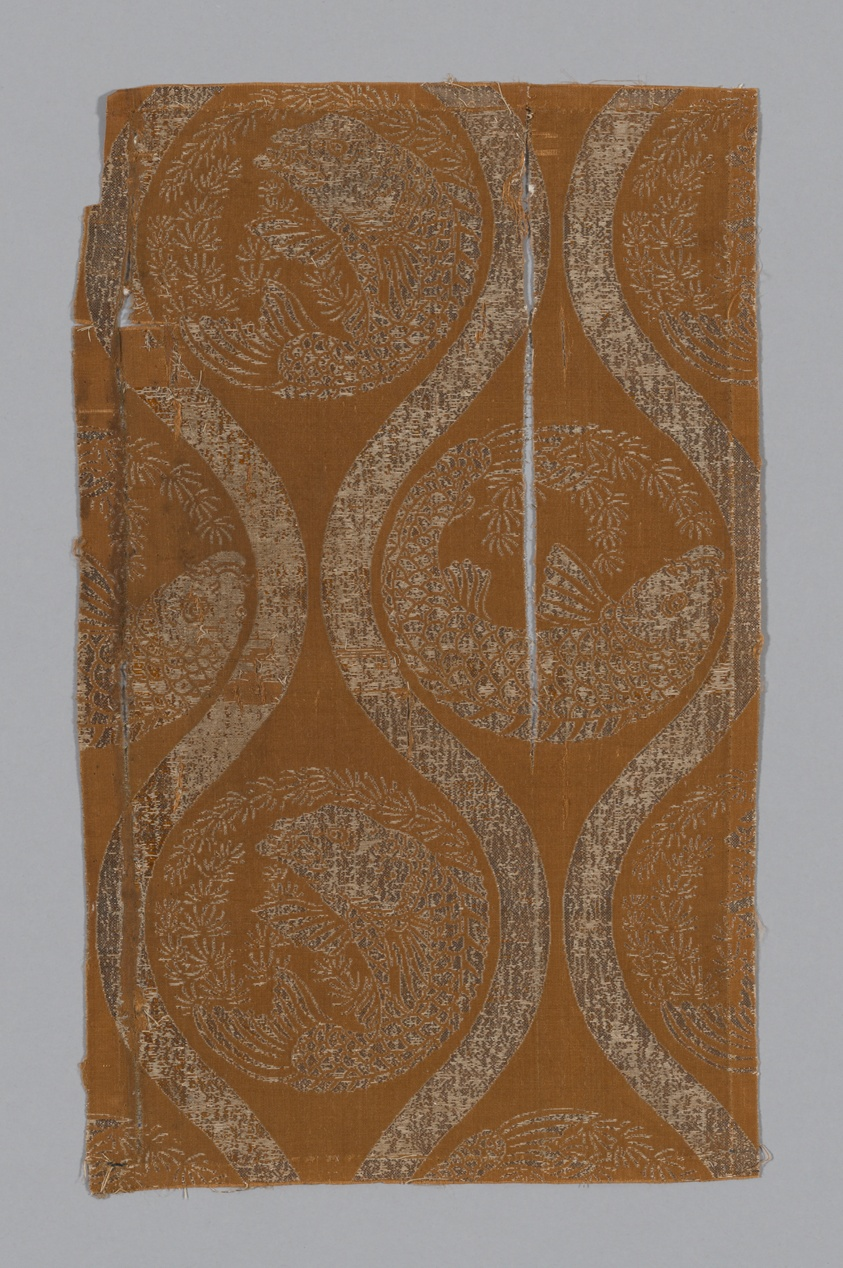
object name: Textile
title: Fragment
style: late edo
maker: Japan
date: late Edo period (1789–1868), 1800/25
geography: Japan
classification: textile; weaving